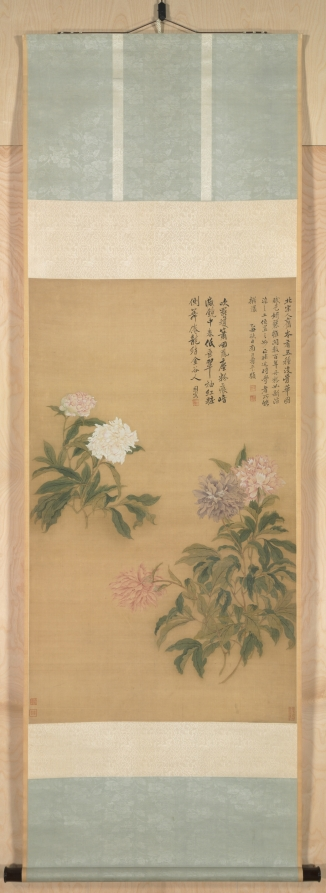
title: Herbaceous Peony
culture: China, Qing dynasty (1644-1911)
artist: Yun Shouping (Chinese, 1633–1690)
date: 1685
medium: Hanging scroll; ink and color on silk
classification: Painting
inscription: Artist's inscription, signature, and 3 seals: An old painting by an anonymous painter of the Northern Song Dynasty has five varieties of flowers painted in the boneless manner. Its colors are so beguiling and beautiful, that even after several hundred years its lead pigments are like new. The skill with which the ink and colors were applied and the subtlety of its composition find no equal among modern followers. On an autumn day in the yichou year [1685], Nantian, Shouping inscribed. [2 seals] Zhengshu; Shouping zhi yin.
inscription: Artist's poem (not translated). Signed Yuange. [seal] Nantian caoyi.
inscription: 3 additional seals of C. C. Wang 王季遷 (1907–2003).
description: Yun Shouping came from Piling (modern Changzhou), Jiangsu province, a center of floral, plant, and insect painting. He had joined the anti-Manchu resistance, was briefly imprisoned, and witnessed the death of family members in 1644. Like other artists, Yun Shouping expressed his Ming loyalism in coded pictures. The peony, king of flowers, and a spring garden motif developed new meaning during the Qing dynasty. The inscription indicates that Yun turns the flower into a motif representing the glorious past. The herbaceous peonies here appear somewhat withered and pale, with faint reddish veins running through its broken branches, perhaps a coded message. The inscription reads, An old painting by an anonymous painter of the Northern Song Dynasty has five varieties of flowers painted in the boneless manner. Its colors are so beguiling and beautiful, that even after several hundred years its lead pigments are like new. The skill with which the ink and colors were applied and the subtlety of its composition find no equal among modern followers.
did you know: In East Asian art, peonies traditionally symbolize prosperity and wealth.